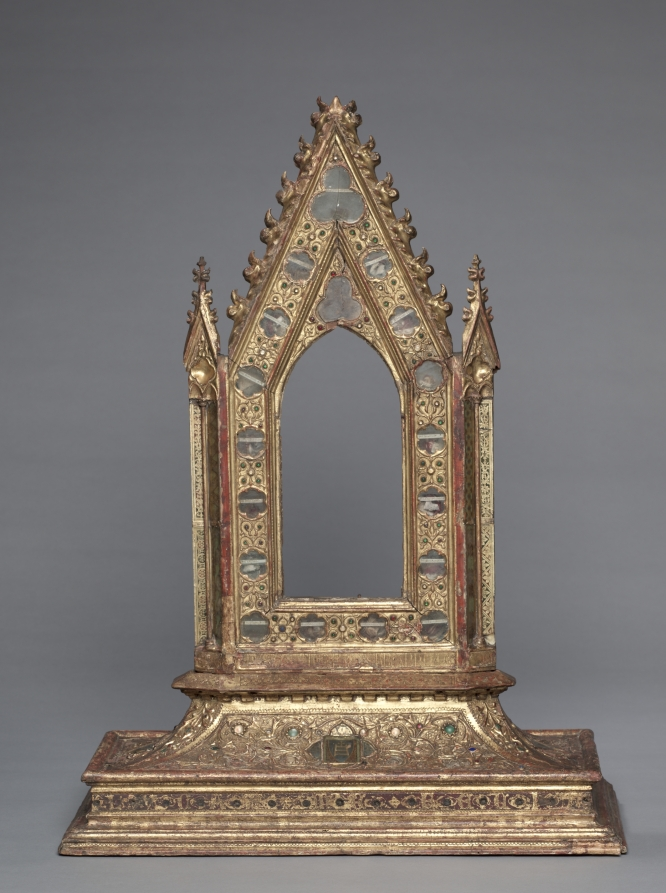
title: Frame for a Portable Reliquary Icon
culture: Italy, Siena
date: 1347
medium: gilded wood, modeled gesso, verre églomisé, glass cabochons, and relics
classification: Glass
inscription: an inscription with a stipled background runs around the lowest edge of the upright part of the frame: obverse: HOC/OPUS : FACTUM . FUIT . SUB . ANNO . DO/MINI; reverse: [small loss] /CCC . XLVII . TEMPORE . DOMINI . MINI/CINI. [This/work : has . been . made . under . year . of . the . Lord [small loss] /300 47 . in . the . time . of the Lord . Mini/Cini.] Another inscription appears on the obverse and reverse of the base: LUCAS ME FECIT. [Luke has made me.]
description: In the Middle Ages relics were thought to possess extraordinary power and were enshrined in lavish vessels called reliquaries. This complex frame once contained a painted image on each side, believed to be the Madonna and the Crucifixion, both long since lost. These images were surrounded by 17 carefully labeled relics, still visible. Intentionally portable, such votive objects could be easily carried from room to room or building to building as needed. A Latin inscription around the base reads: This work has been made under the year of the Lord CCCXLVII [1347] in the time of the Lord Mini/Cini. The inscription likely refers to Mino Cinughi, rector of the Hospital of Santa Maria della Scala in Siena, 1340-51. The Cinughi coat of arms as well as those of the hospital appear on the base. Another inscription, LUCAS ME FECIT (Luke made me), appears on both sides of the base. While this object probably resided on an altar in the hospital, the fact that it has two sides suggests it was carried aloft in processions.